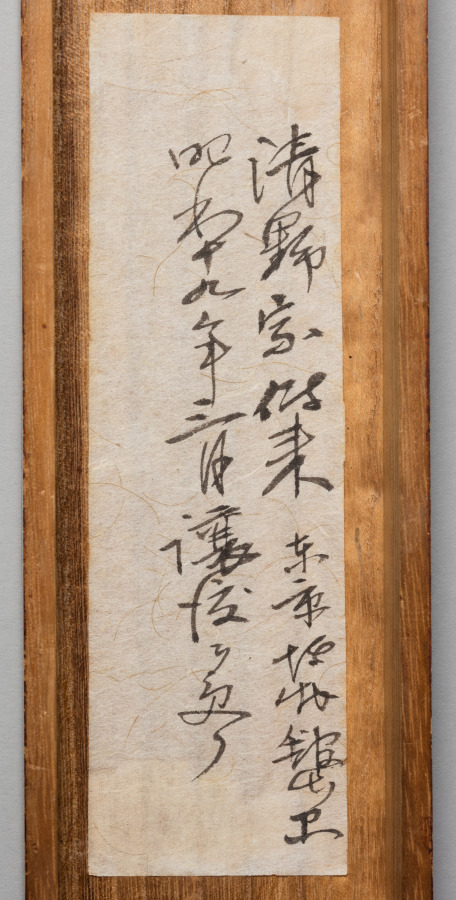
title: Mountain and River in Storm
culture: Japan, Edo period (1615–1868)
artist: Hirowatari Setsuzan (Japanese, ?-1674)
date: early to mid-1600s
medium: hanging scroll; ink on paper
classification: Painting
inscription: signed: Setsuzan hitsu